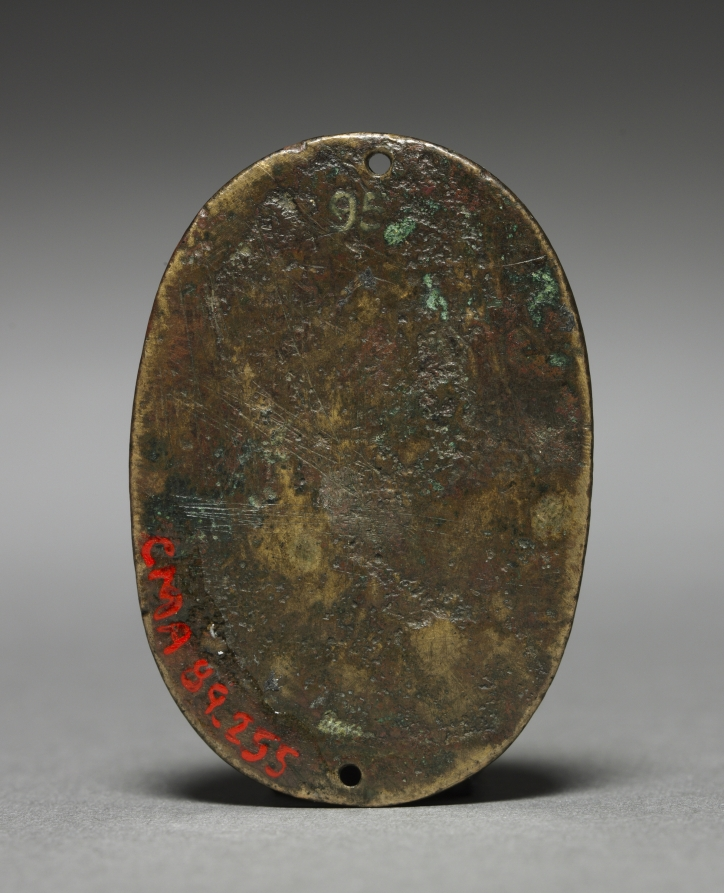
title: Bust of a Woman (Diana?)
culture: Northern Italy, 16th century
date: c. 1500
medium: gilt bronze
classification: Sculpture